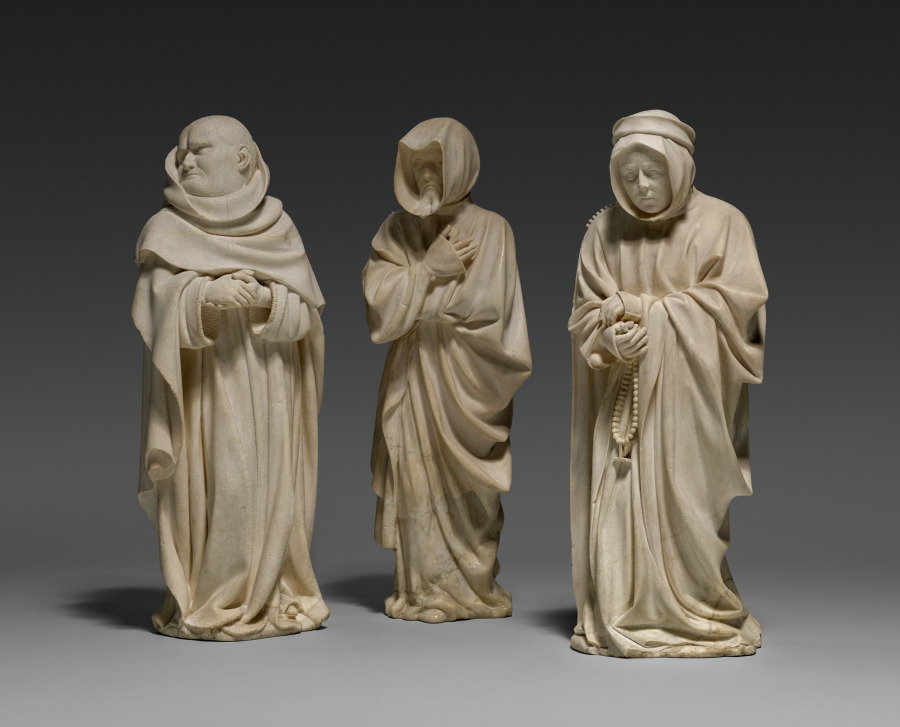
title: Mourner from the Tomb of Philip the Bold, Duke of Burgundy (1364–1404)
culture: Netherlands, active Dijon, 15th century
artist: Claus de Werve (Netherlandish, 1380–1439)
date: 1404–1410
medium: vizille alabaster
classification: Sculpture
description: This figure comes from the tomb of Duke Philip the Bold from the church of Champmol near Dijon (Burgundy, France). Philip, who founded the monastery and designated it as his burial place, hired the best artists, many of whom came from the Netherlands. While the commission was given in 1381, the work was not completed until 1410, six years after the duke’s death. This mourner is unusual for the time because it is not carved as a static low relief on the pedestal of the tomb but interacts with the viewers and their fellow procession members. The lifelike quality of the figure is due in large part to the alabaster. Its softness allowed artists to carve details into the material, and the transparent, milky white stone could also be polished to a high gloss.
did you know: During his life, Duke Philip founded the monastery of Chartreuse de Champmol to serve as a final resting place for himself and his family.